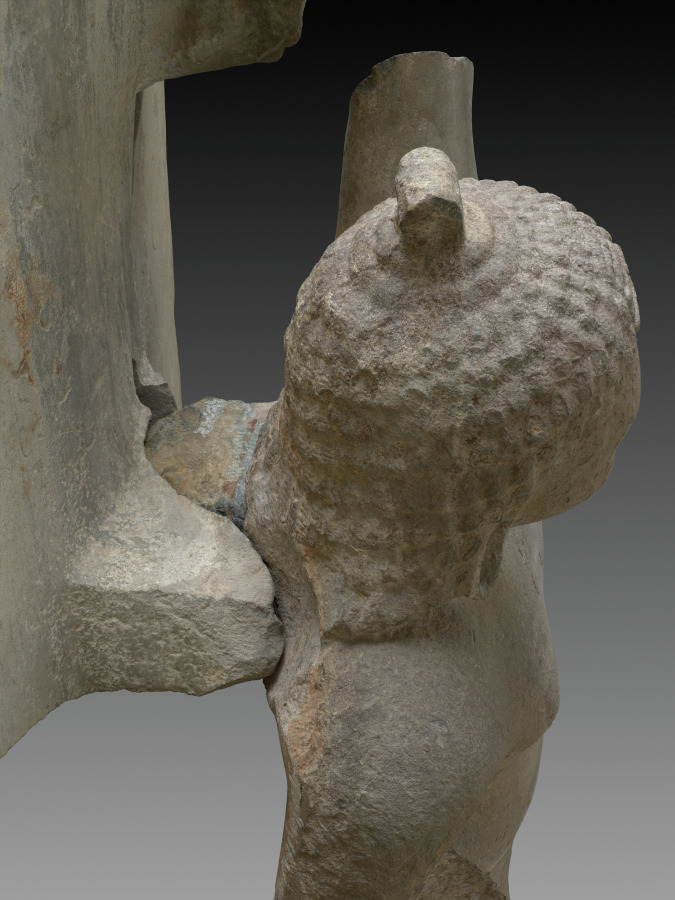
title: Krishna Lifting Mount Govardhan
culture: Southern Cambodia, Takeo Province, Phnom Da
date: c. 600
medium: Sandstone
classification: Sculpture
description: This masterwork of early Cambodian sculpture shows the Hindu god Krishna effortlessly holding aloft a mountain to protect his fellow villagers and herds from torrential storms sent by a jealous old god. It is one of eight monumental monolithic figures recovered from a two-peaked mountain in the floodplains of the Mekong River delta, on the outskirts of the ancient urban center of Angkor Borei.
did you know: Gold earrings were once fastened to the sculpture using holes in the figure's earlobes.